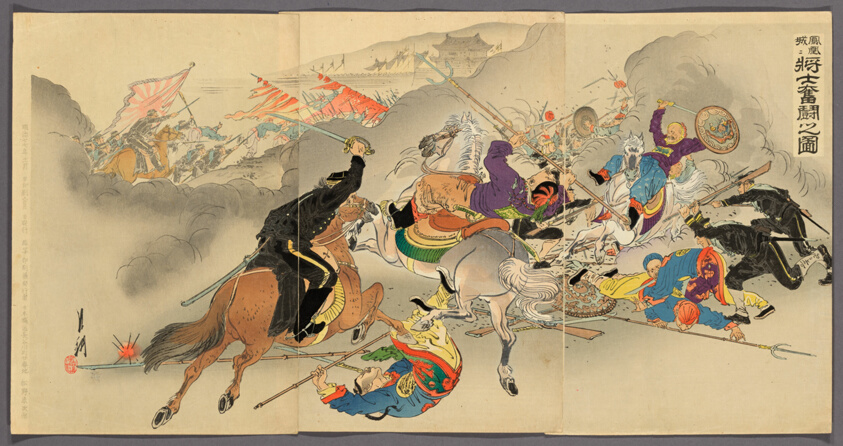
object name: Print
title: Soldiers Fighting Furiously at Fenghuangcheng (Hoojo ni shoshi funto no zu)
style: Japanese (culture or style)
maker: Ogata Gekko (Japanese, 1859-1920)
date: 1894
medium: Color woodblock print; oban triptych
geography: Japan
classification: woodblock print; print